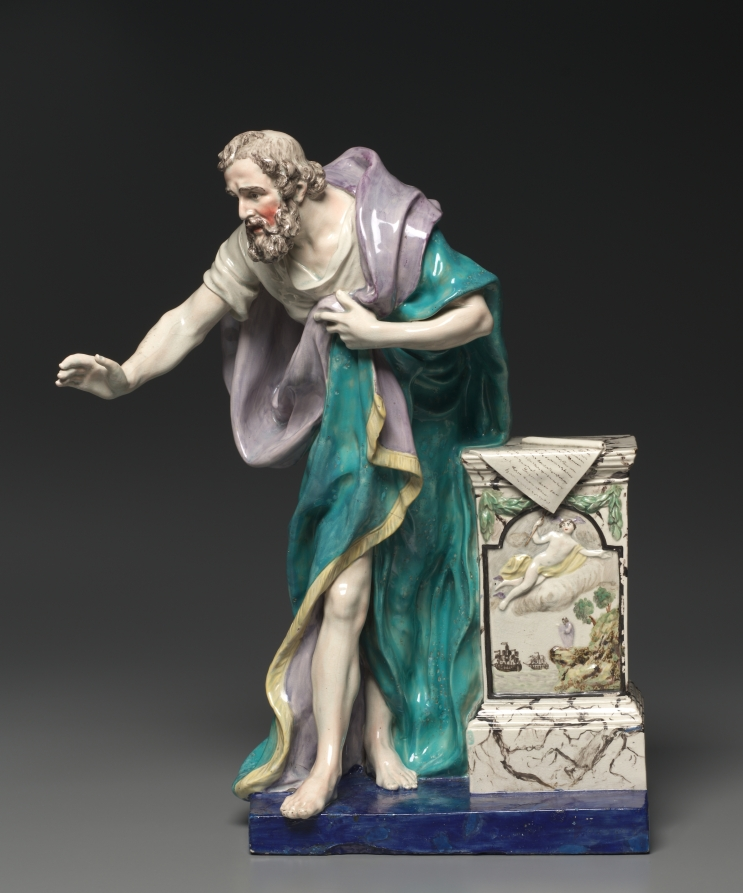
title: Figure of Demosthenes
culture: England, Staffordshire, Burslem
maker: Enoch Wood (British, 1759–1840)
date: c. 1800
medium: lead glazed earthenware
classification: Ceramic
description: Ceramic figures often depicted literary or mythological characters as a means of representing knowledge and intellectual refinement. As a result, they became an integral part of the decoration of most middle-class or wealthy houses in the 1700s and early 1800s. This figure depicts the Athenian orator Demosthenes (384–322 BC) delivering one of his philosophical lectures. The adjacent plinth reinforces his identity with a small image of a man lecturing the sea, something Demosthenes was known to do, while Hermes, the Greek god of eloquence, hovers above.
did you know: In Victorian times, this figure was thought to depict St. Paul preaching in Athens, but it actually portrays the Greek orator Demosthenes delivering one of his philosophical lectures.